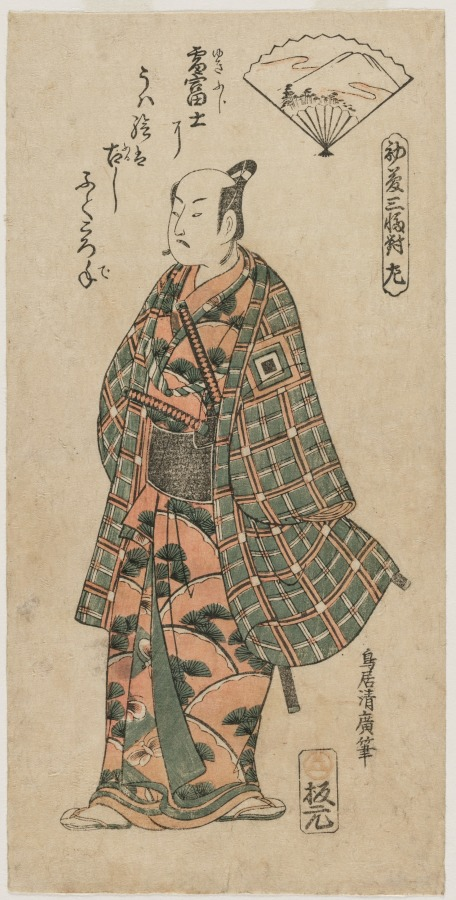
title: Ichikawa Danjuro II as a Young Samurai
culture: Japan, Edo period (1615–1868)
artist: Torii Kiyohiro (Japanese, active 1750s-70s)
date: 1750s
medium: color woodblock print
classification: Print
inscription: Signature: Torii Kiyohiro hitsu Publisher: Urokogataya (hanmoto, emblem)